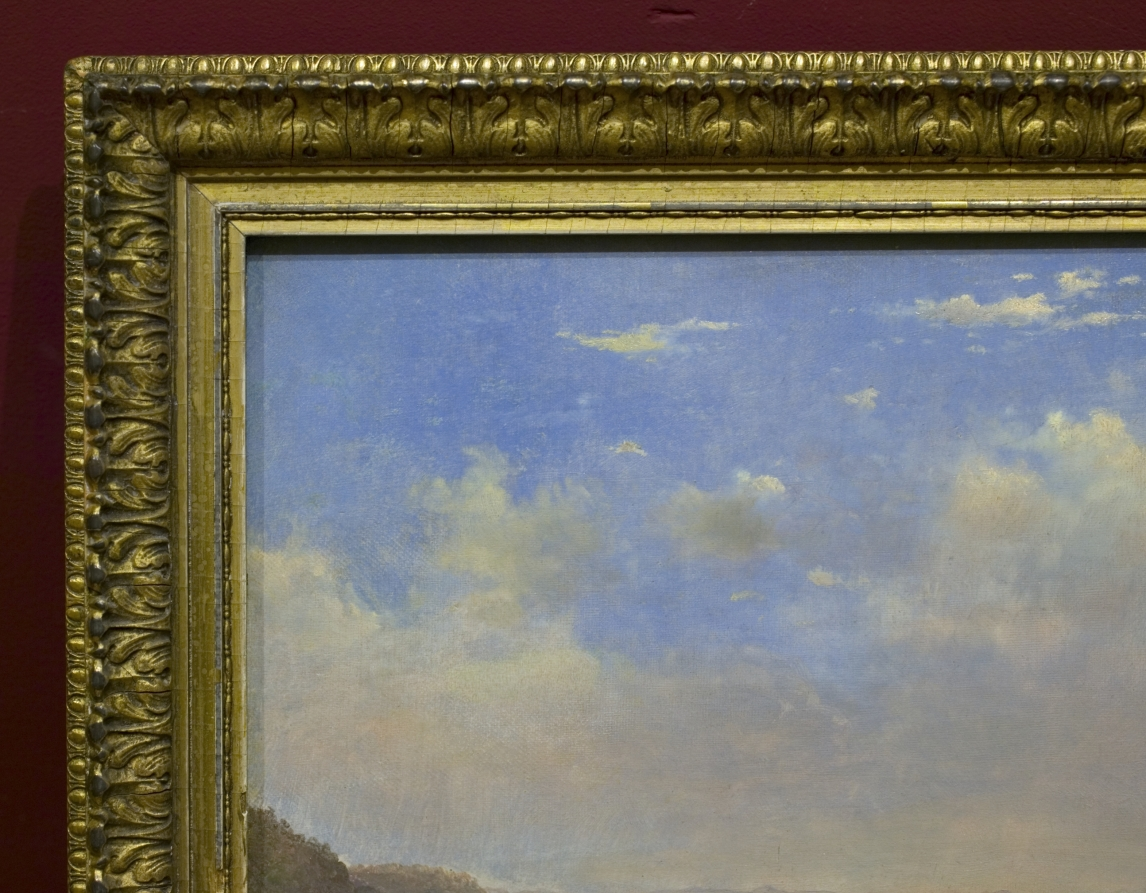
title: View of Lake Pepin, Minnesota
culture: America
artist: Robert S. Duncanson (American, 1821–1872)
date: 1862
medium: oil on canvas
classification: Painting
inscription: Signed lower left: R.S.D. / 1862; signed on verso: Valley of Lake Pepin/Minnesota/Painted By R.S.D.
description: Duncanson was the first African American painter to achieve recognition at home and abroad. Although most of his career was spent in Cincinnati, he painted this calm, panoramic scene during a journey up the Mississippi River to Canada, which he likely made to escape the upheaval of the Civil War. Duncanson worked in Montreal and London, England, before returning home after the war.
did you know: The sport of waterskiing was invented on Lake Pepin in 1922.